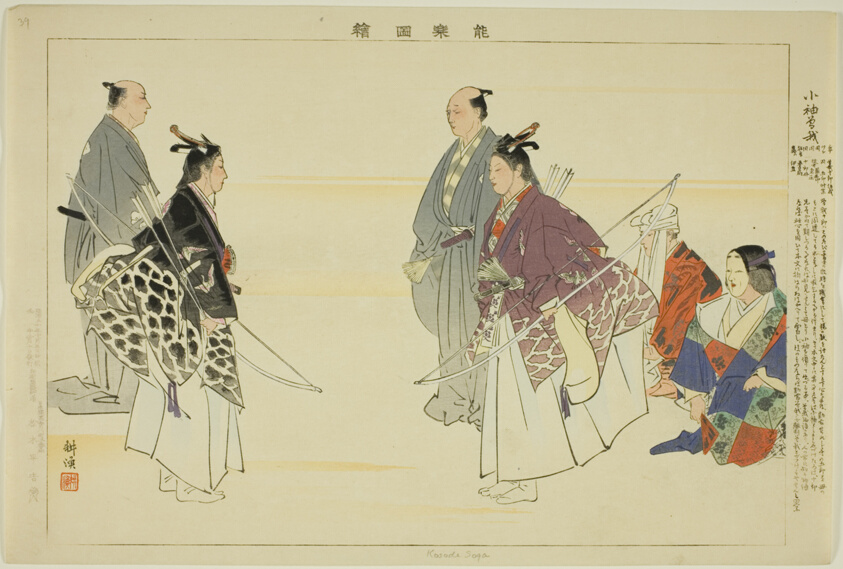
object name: Print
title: Kosode Soga, from the series "Pictures of No Performances (Nogaku Zue)"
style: Japanese (culture or style)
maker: Tsukioka Kogyo; Japanese, 1869-1927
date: 1898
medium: Color woodblock print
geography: Japan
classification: woodblock print; print; asian art